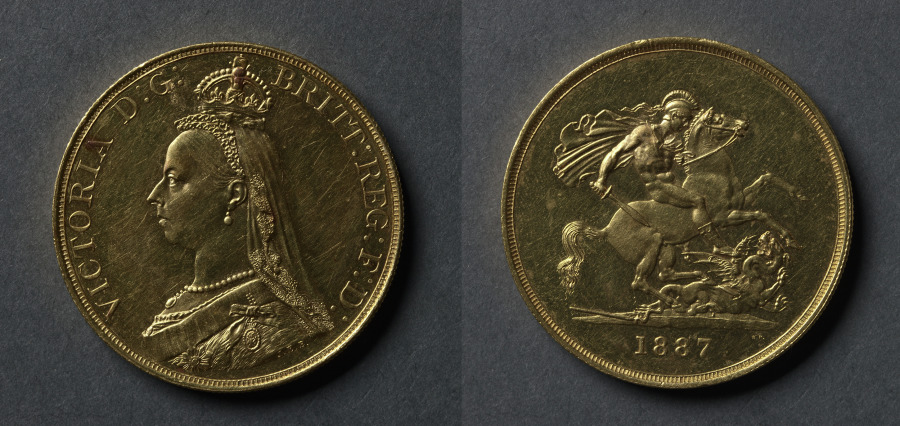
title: Five Pound Piece: Victoria (obverse); St. George and the Dragon (reverse)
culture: England, Victoria, 1837-1901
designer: after Benedetto Pistrucci (Italian, 1784–1855)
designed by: Joseph Boehm (British, 1834–1890)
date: 1887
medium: gold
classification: Coins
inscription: VICTORIA D: G: BRITT: REG: F: D:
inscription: 1887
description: The obverse design of this piece is usually known as the "Jubilee head," since 1887, the year of its production, was the Golden Jubilee of Queen Victoria. By Sir Joseph Boehm, R.A., sculptor in ordinary to the queen, it caused a minor storm since it was said the tiny crown made the queen look ridiculous. The queen is said not to have liked the design herself, but she did in fact wear a small crown of this type when she began to find the full-size crown too heavy. The crown may be seen among the Crown Jewels at the Tower of London.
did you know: This piece was not made for circulation but was part of a proof set.